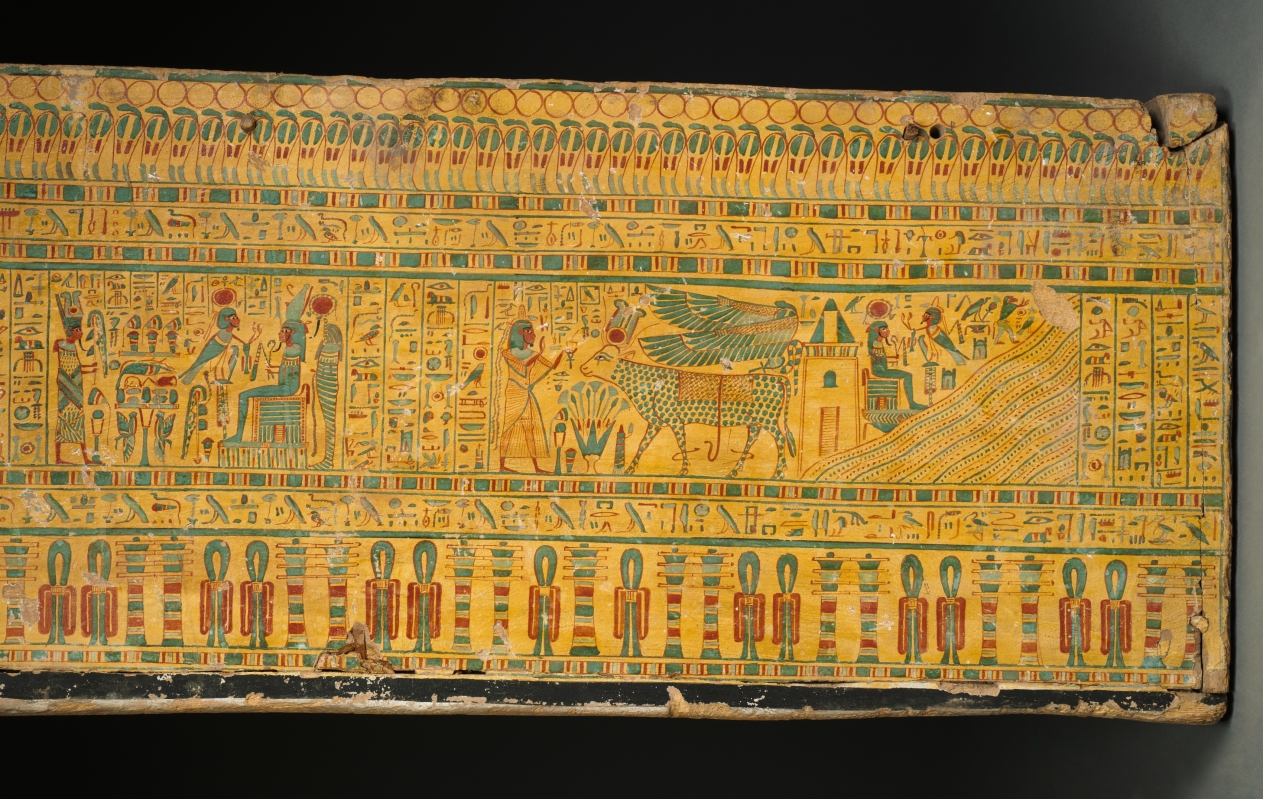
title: Coffin of Bakenmut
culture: Egypt, Thebes, Third Intermediate (1069–715 BCE), Dynasties 21–22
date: c. 1000–900 BCE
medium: gessoed and painted sycamore fig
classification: Funerary Equipment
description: The coffin of Bakenmut is one of the finest examples of painted wooden coffins made for the priests of Amen and their families at Thebes during Dynasty 21 and early Dynasty 22. The pharaohs of this time were no longer buried in the Valley of the Kings, but instead built tombs in the Delta, far to the north, where they resided. Security was lax in the Theban necropolis. The coffins and funerary goods of the wealthy citizens of Thebes were placed in unmarked and undecorated family tombs cut into the cliffs on the west bank of the Nile. All the care and detail that in more prosperous times were devoted to the decoration of the tomb chapel were now lavished on the elaborately painted coffins. Every available surface is crowded with religious scenes, images of funerary gods and goddesses, protective spells, and magical symbols. The deceased appears mummiform. An elaborate floral collar entirely covers the upper body, exposing only the separately attached hands (now lost). A pair of red "mummy braces" are crossed over the chest, their point of intersection marked by a winged sun disk. The lower body is covered with tiny figures modeled in gesso against a yellow background, which gives the effect of gold inlaid with glass or semiprecious stone. The decoration on the interior features two deified dead kings of Dynasty 18. Although these rulers had lived centuries before, memory of their greatness was still very much alive. The main scene near the top depicts Tuthmosis III, the great military pharaoh, who lived 500 years before Bakenmut. Posed as a mummy, the ruler wears a brilliant feathered garment enfolding him with falcon’s wings. The scene below features back-to-back seated images of Amenhotep I, regarded as the patron of the Theban cemetery and worshiped as a local god there.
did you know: Originally another smaller coffin was placed inside this outer coffin and in that the deceased with a mummy board would have rested.